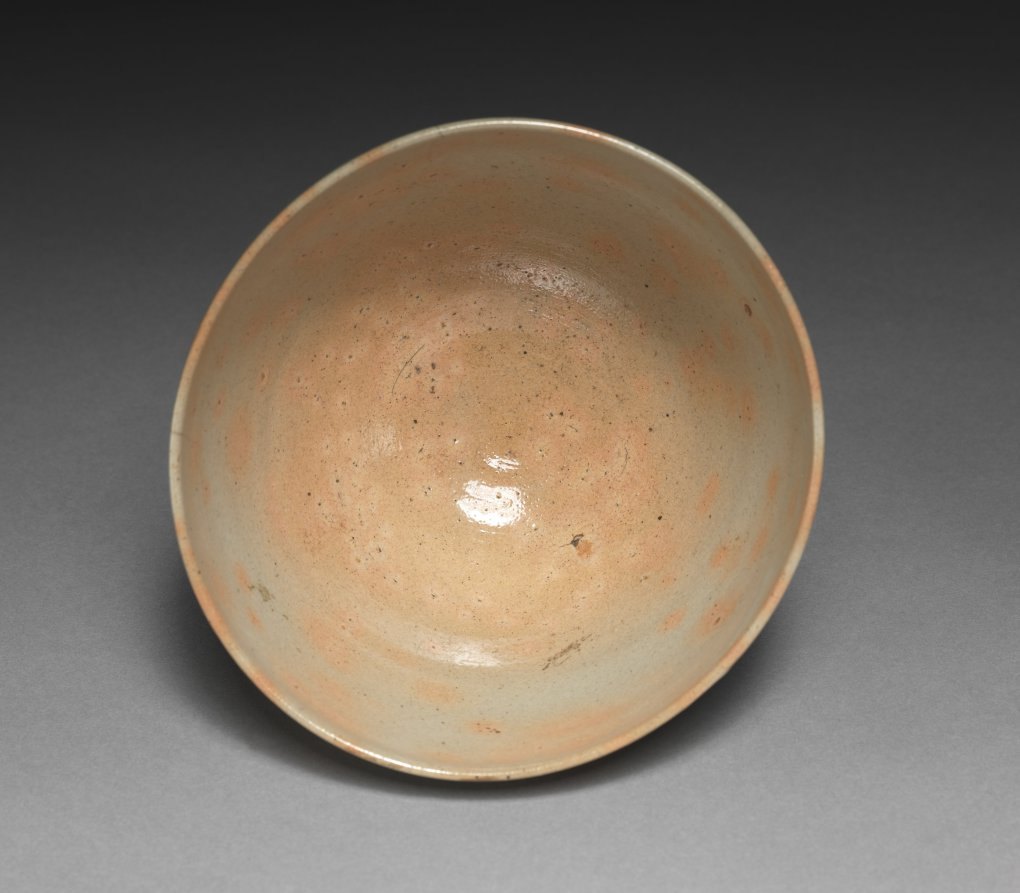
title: Tea bowl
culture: Korea, Joseon dynasty (1392–1910)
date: 1700s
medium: glazed stoneware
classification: Ceramic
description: Possibly produced in one of the kilns established by the trading office (Waegwan) in Busan, southern Gyeongsang province, this type of bowl with an elongated foot was exported to Japan and circulated as an item of foreign luxury among Japanese tea ware collectors. Pinholes in the light pinkish glaze were intended to resemble "fawn spots."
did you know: Pinholes in the light pinkish glaze were intended to resemble "fawn spots."